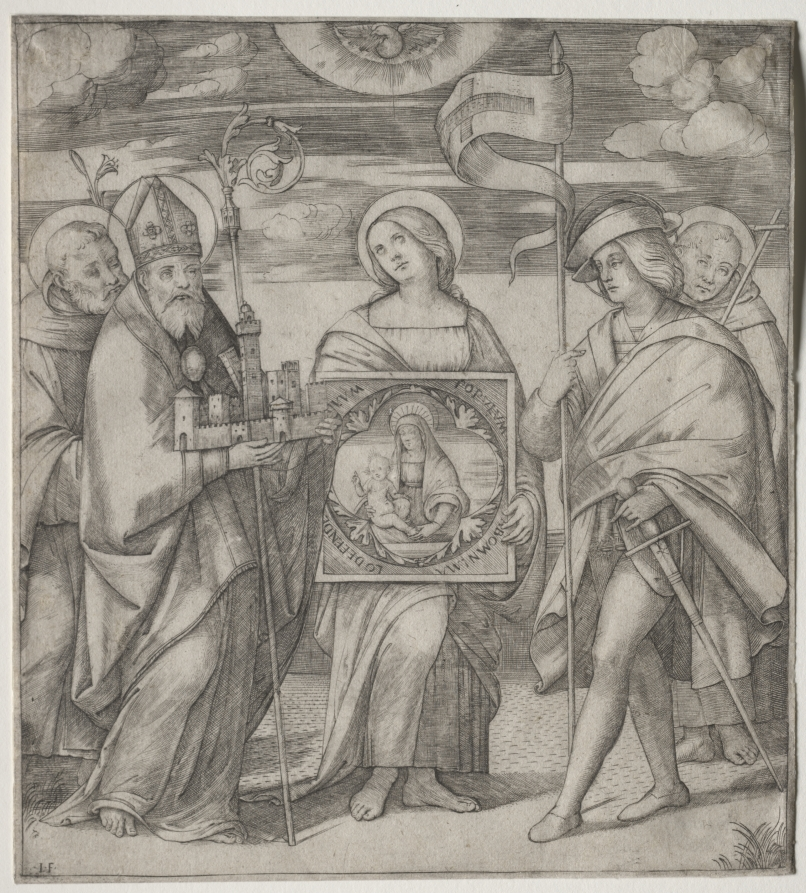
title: Patron Saints of Bologna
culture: Italy, 16th century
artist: Giacomo Francia (Italian, before 1486–1557)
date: c. 1515–1520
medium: engraving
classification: Print